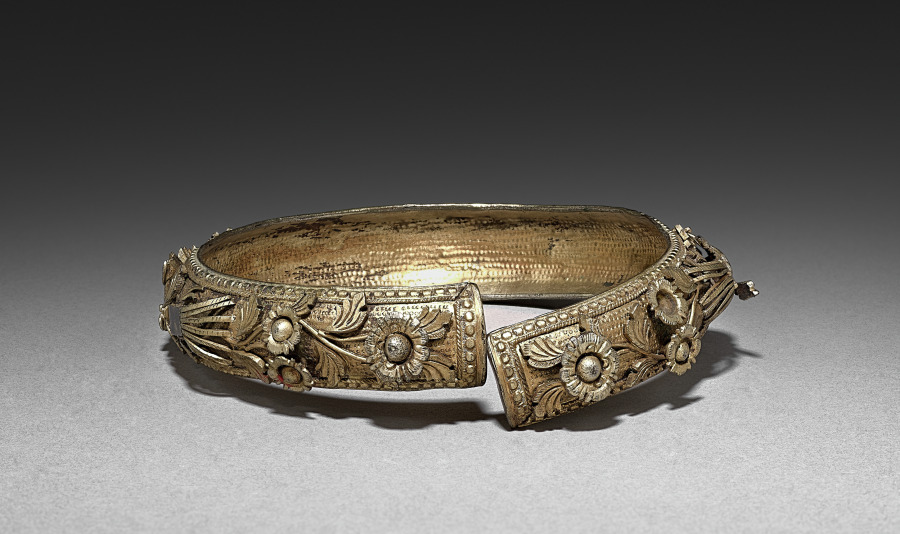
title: Armlet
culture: Burma (?)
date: 1800s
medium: silver gilt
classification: Jewelry